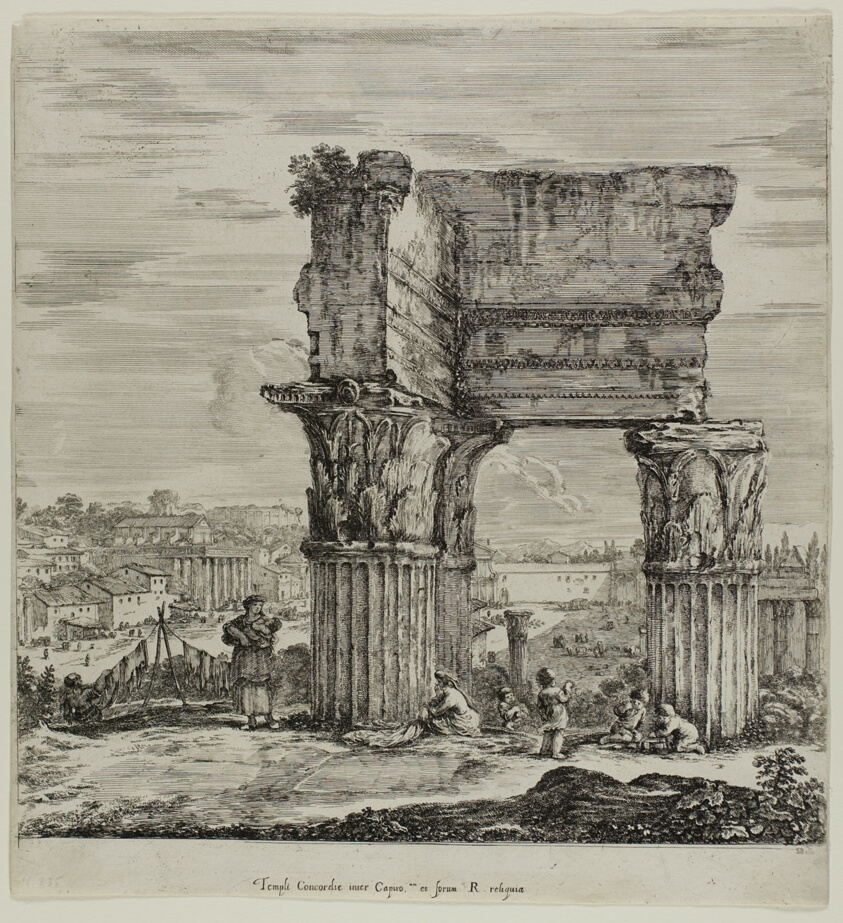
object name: Print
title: Temple of Concordia and the Roman Forum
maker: Stefano della Bella (Italian, 1610-1664)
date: 1654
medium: Etching on ivory laid paper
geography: Italy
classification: etching; print; prints and drawing